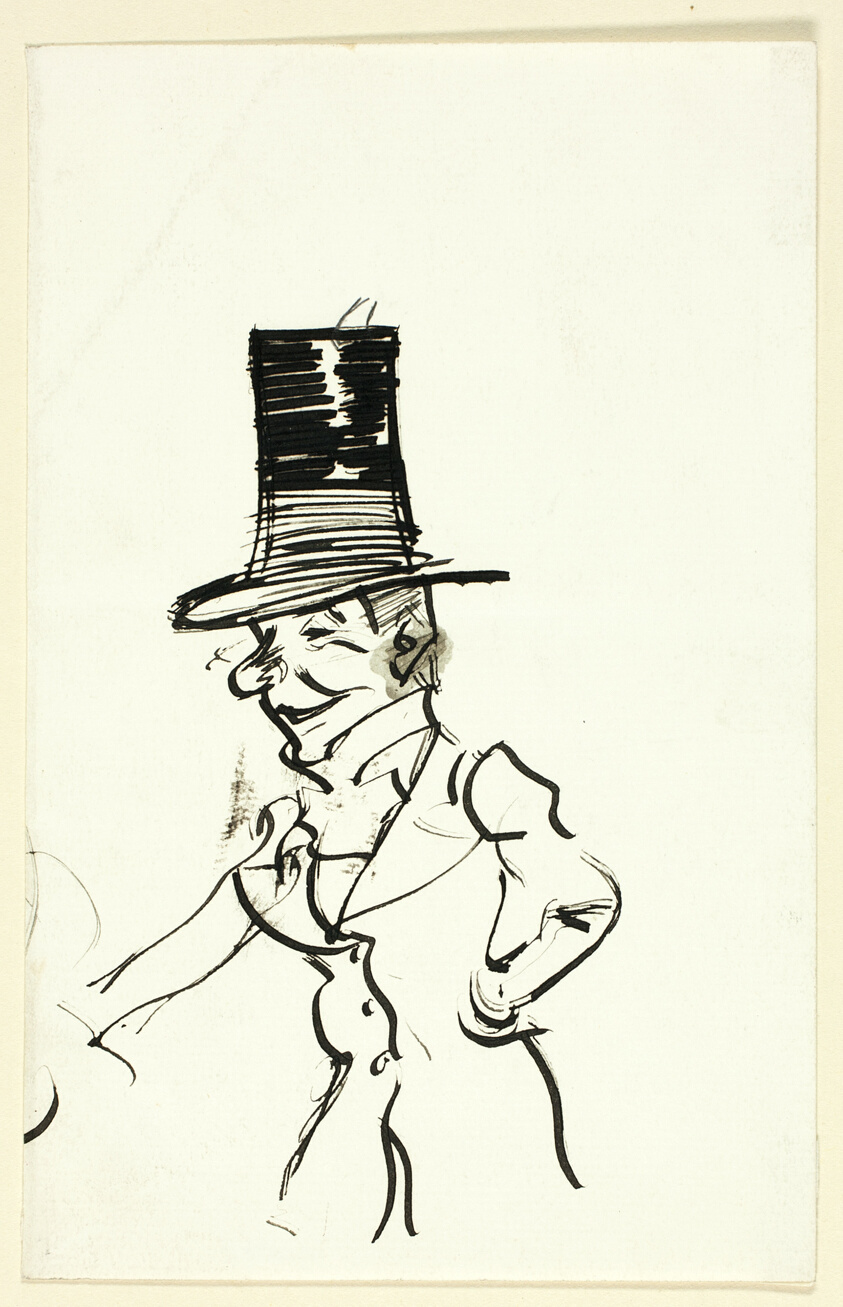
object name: Drawing and Watercolor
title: Portrait of Paul Maitland, Artist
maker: Philipp William May; English, 1864-1903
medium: Pen and black ink on ivory laid paper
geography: England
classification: pen and ink drawings; drawings (visual works); prints and drawing